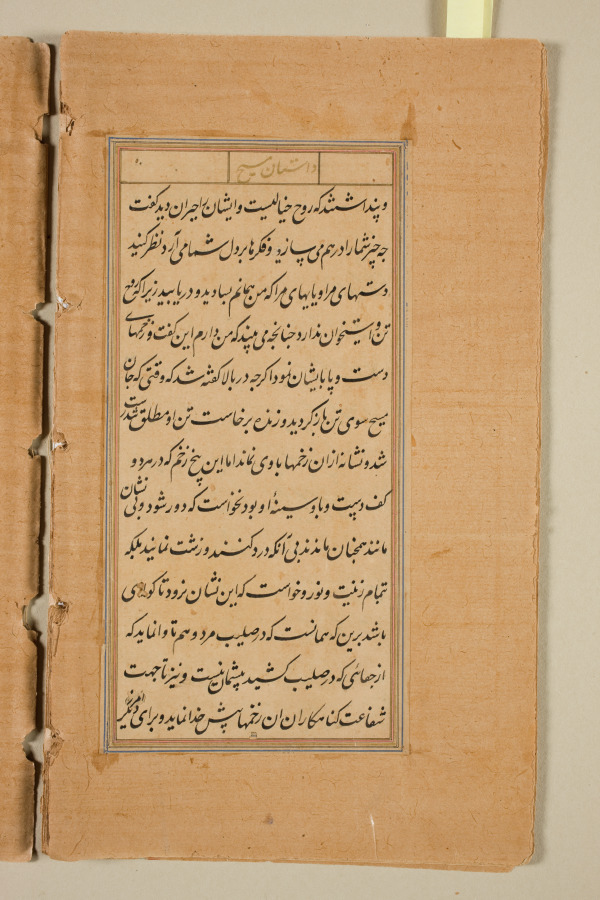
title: Text page from a Mirror of Holiness (Mir’at al-quds) of Father Jerome Xavier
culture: Mughal India, Allahabad, made for Prince Salim (1569–1627)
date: 1602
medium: Ink and gold on paper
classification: Manuscript